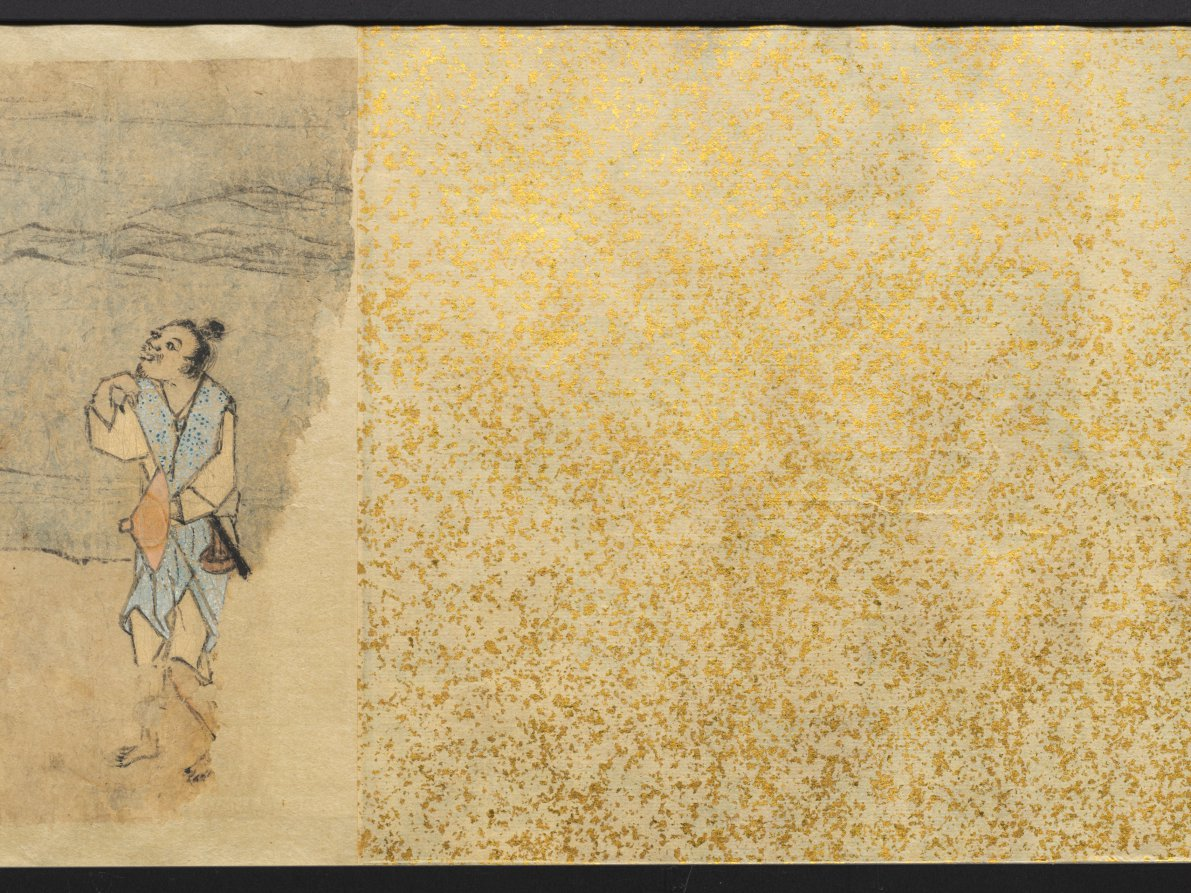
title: The Saltmaker's Story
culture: Japan, Edo period (1615–1868)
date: early 1600s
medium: One of a pair of handscrolls; ink, color, and gold on paper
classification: Painting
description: Once read and copied by girls at New Year’s celebrations and included in dowries, The Saltmaker’s Story is a rags-to-riches tale in which daughters are gifts from the gods. Despite his simple outlook, the main character progresses from humble roots as an associate at Kashima Shrine to the elite status of grandfather of the emperor through the intervention of the Kashima deity. The Saltmaker’s Story is traditionally presented in a set of three scrolls, but the text of this set has been removed by a previous owner, who remounted the illustrations as a pair. The paintings of this one take us from right to left through the first half of the tale.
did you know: This handscroll originally had texts before its paintings, but the texts were removed.